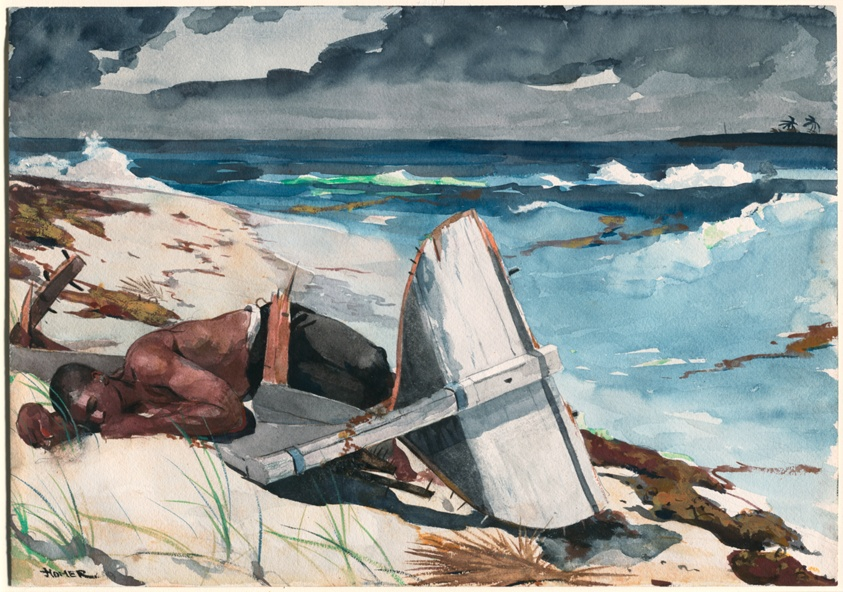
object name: Drawing and Watercolor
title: After the Hurricane, Bahamas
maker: Winslow Homer (American, 1836-1910)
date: 1899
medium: Transparent watercolor, with touches of opaque watercolor, rewetting, blotting and scraping, over graphite, on moderately thick, moderately textured (twill texture on verso), ivory wove paper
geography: United States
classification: watercolor; drawings (visual works); prints and drawing; paper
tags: seascapes, people, boats, Century of Progress, world's fairs, Chicago World's Fairs, weather/seasons